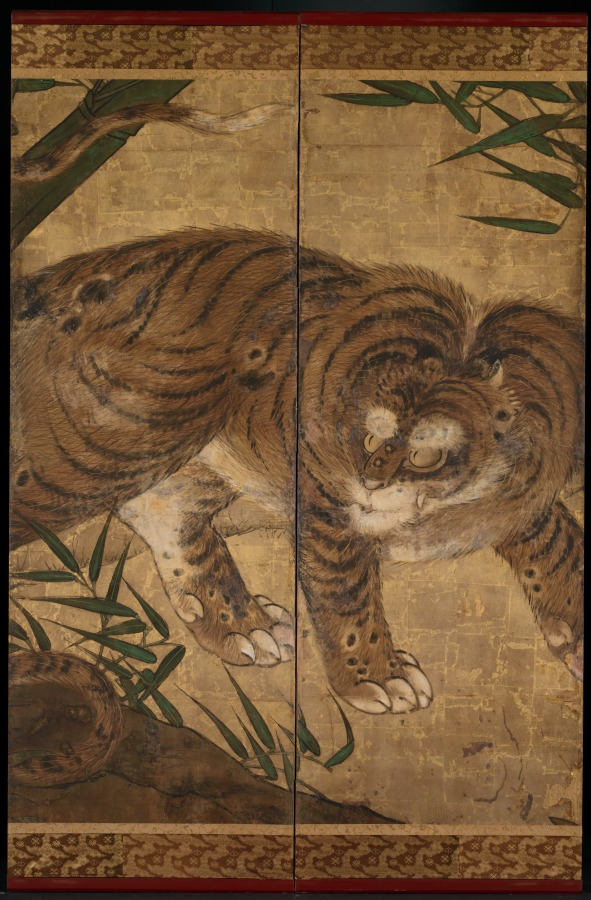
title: Lions and Tigers in Peony and Bamboo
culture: Japan, Edo period (1615–1868)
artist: Yamaguchi Sekkei (Japanese, 1644–1732)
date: 1668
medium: One of a pair of six-panel folding screens; ink and color on gilded paper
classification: Painting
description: Sekkei lived and studied painting in Kyoto at the Kano school studio, the center of traditional painting activity in Japan since 1500. The use of gold foil as a backdrop for the frolicking animals served a practical as well as a decorative function. Because traditional Japanese rooms had no windows, interior lighting came from portable oil lamps and wax candles, whose effects were magnified by reflective surfaces.